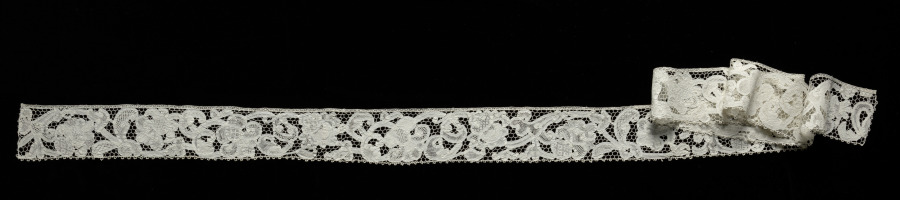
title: Lace Edging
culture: Italy, Genoa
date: 1700s–1800s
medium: Linen: needle lace and bobbin lace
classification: Lace